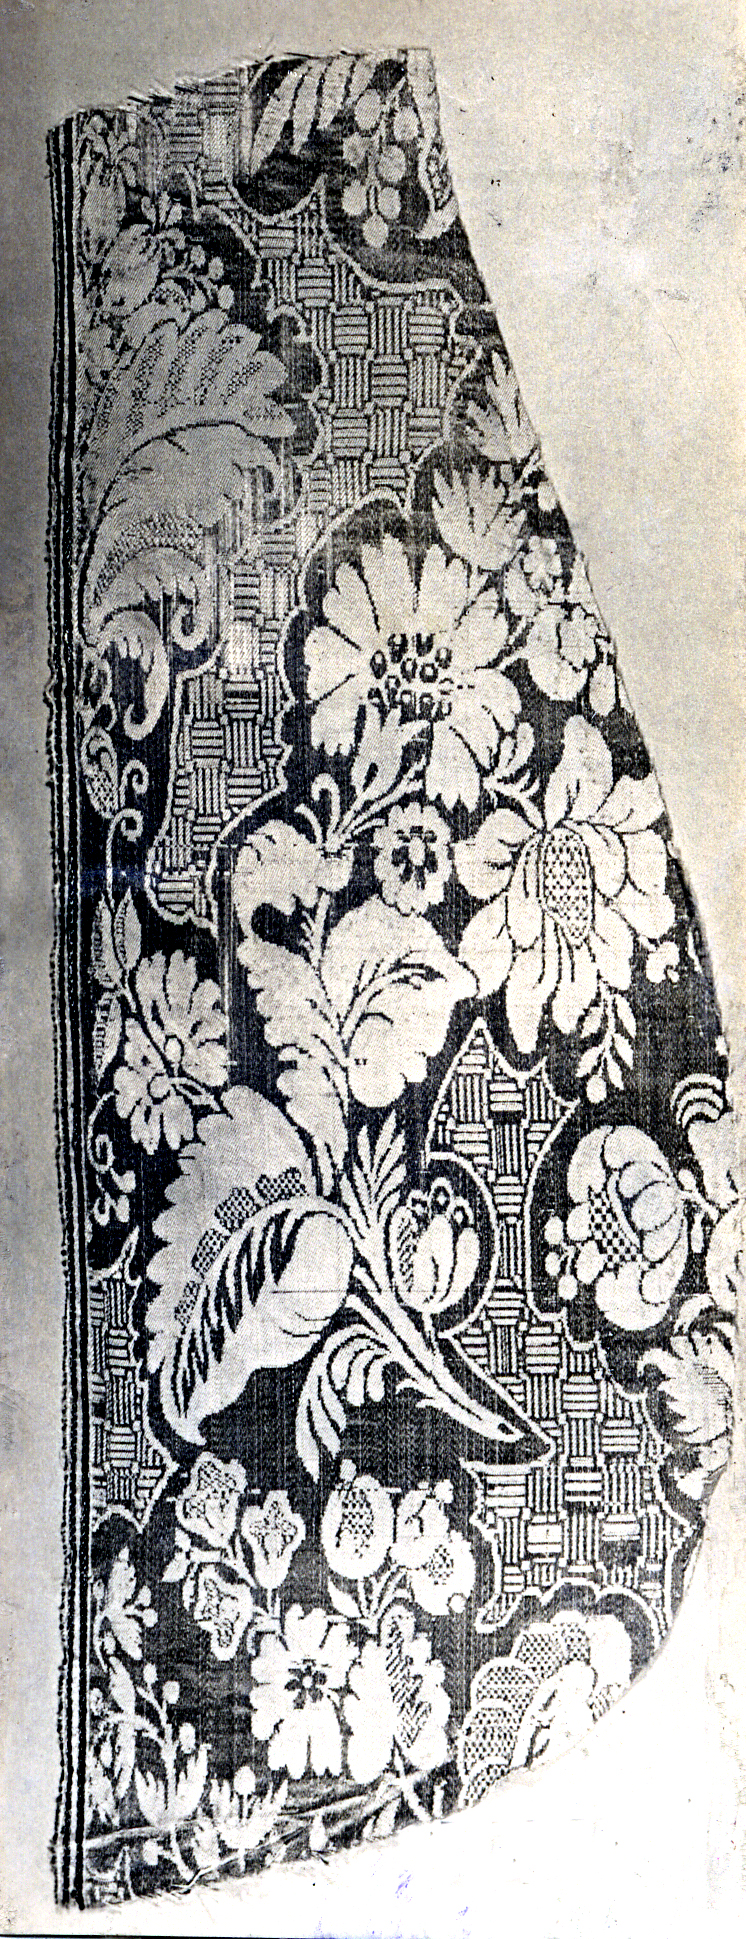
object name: Textile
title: Fragment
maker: France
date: Late 17th century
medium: Silk, simple fancy satin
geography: France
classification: textile; weaving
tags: flowers